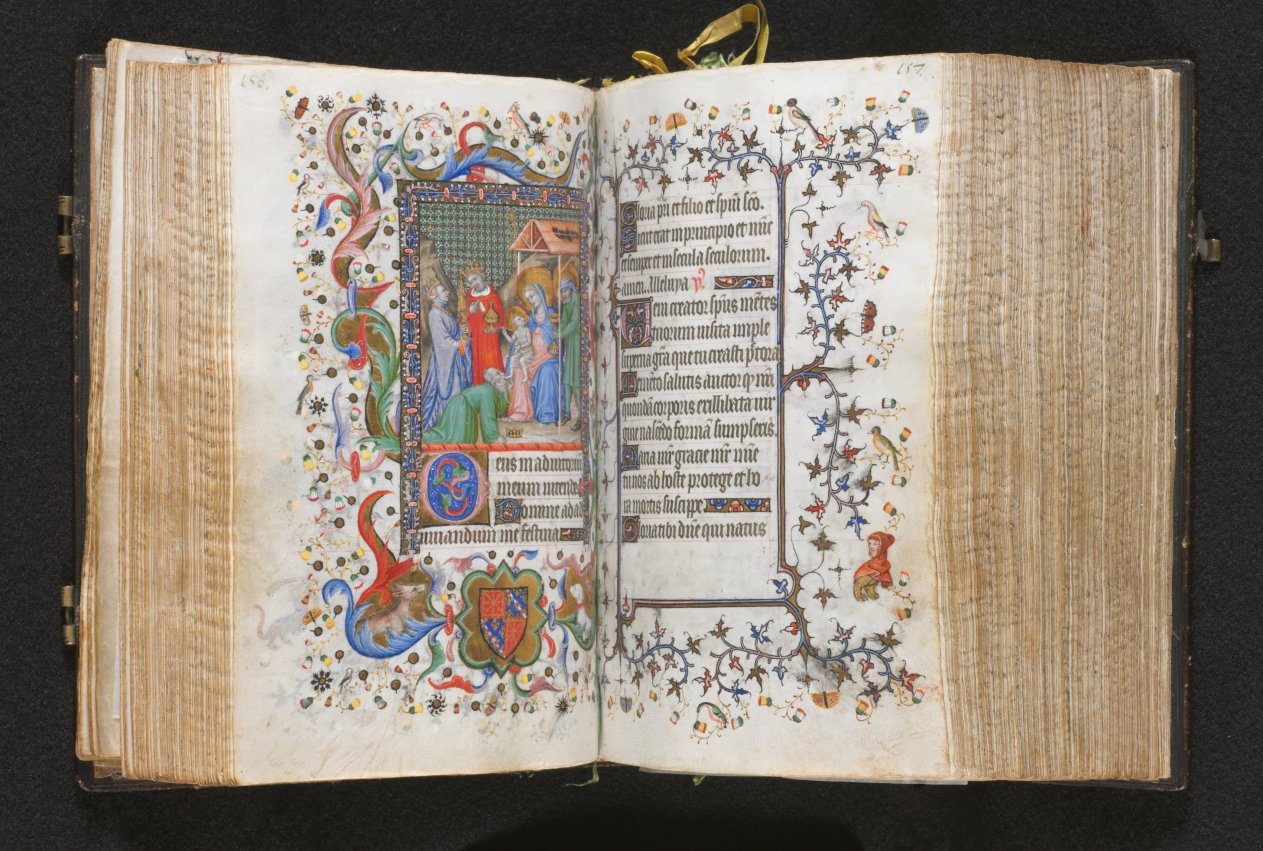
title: Hours of Charles the Noble, King of Navarre (1361-1425): fol. 78v, Adoration of the Magi (Sext)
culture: France, Paris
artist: Master of the Brussels Initials and Associates (French)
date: c. 1405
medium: ink, tempera, and gold on vellum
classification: Bound Volume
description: This precious volume was obviously highly prized by its owner, the French-born King of Navarre, who had his coat of arms painted on no less than twenty folios. Rather than directly commissioning this manuscript from a specific workshop, it seems that Charles the Noble acquired his book of hours -- perhaps ready-made for the luxury market -- while on a trip to Paris in 1404-05. A collaborative effort, six painting styles are evidenced within the pages of this codex, those of two Italians, two Frenchmen, and two Netherlanders. The painter who was responsible for the planning and decoration of the book, and who produced seventeen of the large miniatures, was a Bolognese artist known as the Master of the Brussels Initials. His principal assistant, responsible for most of the borders, was a Florentine who signed his name "Zecho" da Firenze on folio 208 verso.